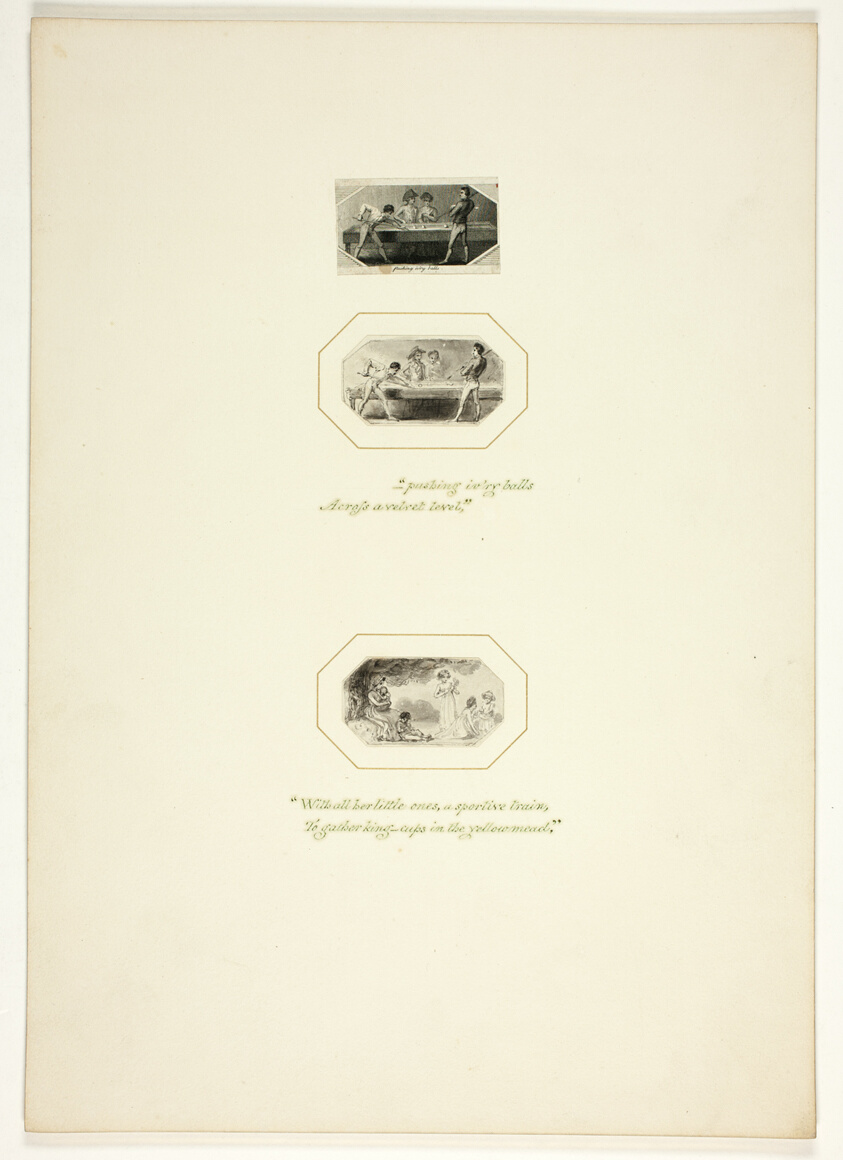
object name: Print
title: Plate from The Task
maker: after Thomas Stothard (English, 1755-1834); published by T. Baker (English, 19th century)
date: c. 1800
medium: Engraving on paper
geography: England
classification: engraving; prints and drawing; print